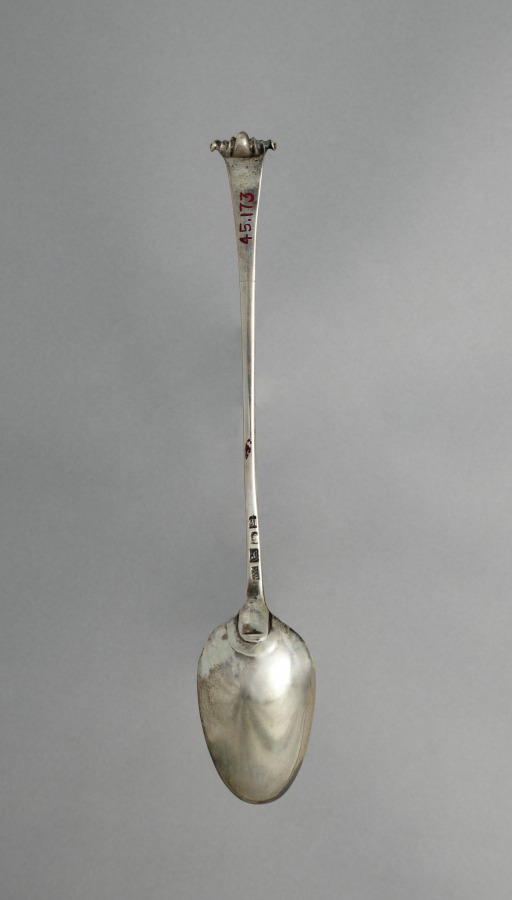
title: Serving Spoon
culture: England, London, 19th century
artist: assisted by William Wooler (British)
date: 1763–1764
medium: silver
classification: Silver